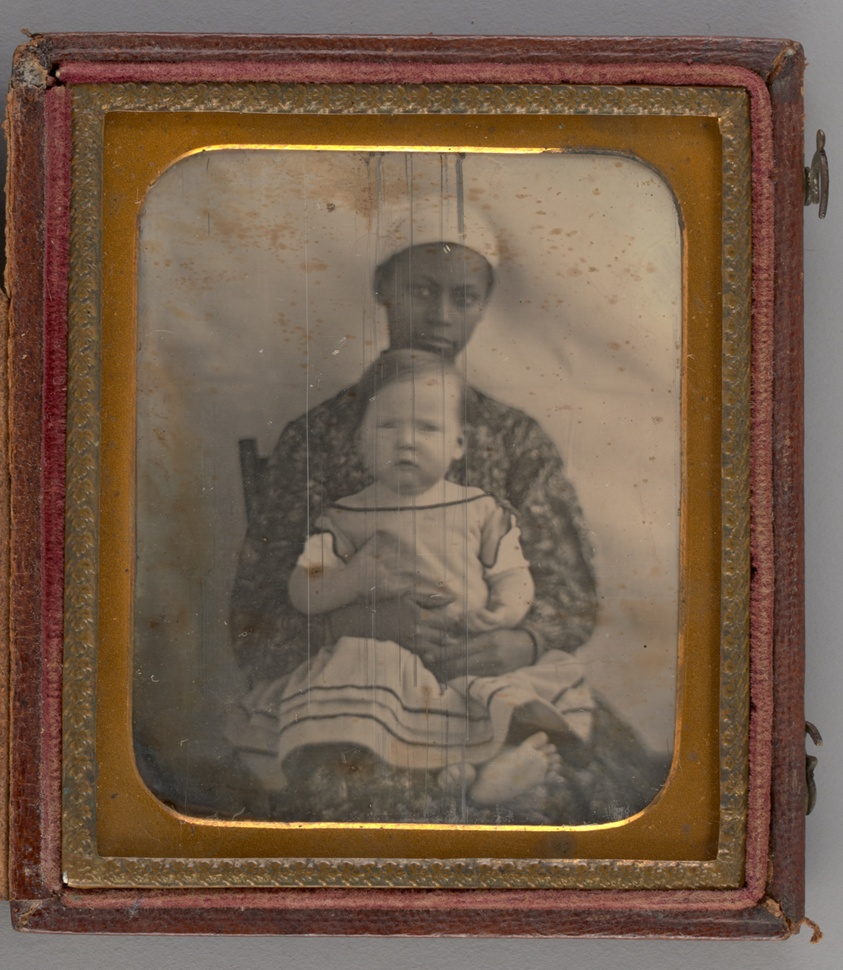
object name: Photograph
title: Untitled (Portrait of Woman Holding a Child)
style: 19th century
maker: Unknown maker; American, 19th century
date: 1850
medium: Daguerreotype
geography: United States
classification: portrait; daguerreotype; photograph; photography; portrait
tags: lundberg collection, portraits: female subject, African American, portraits, portraits: African American subject